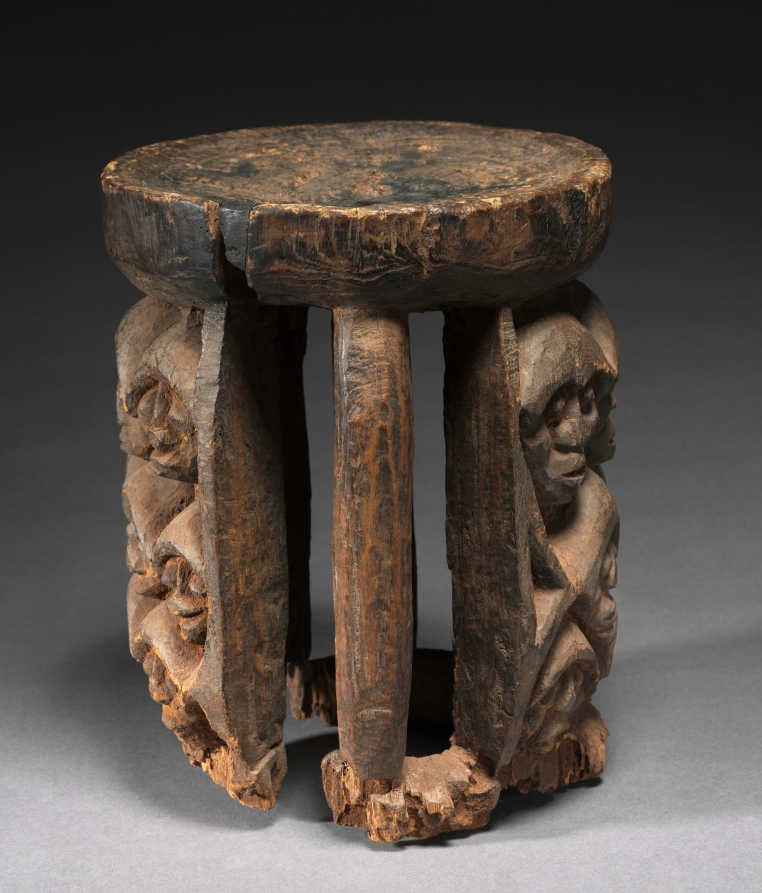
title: Stool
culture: Africa, Central Africa, Cameroon, unknown maker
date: c. 1910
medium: Wood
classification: Furniture and woodwork